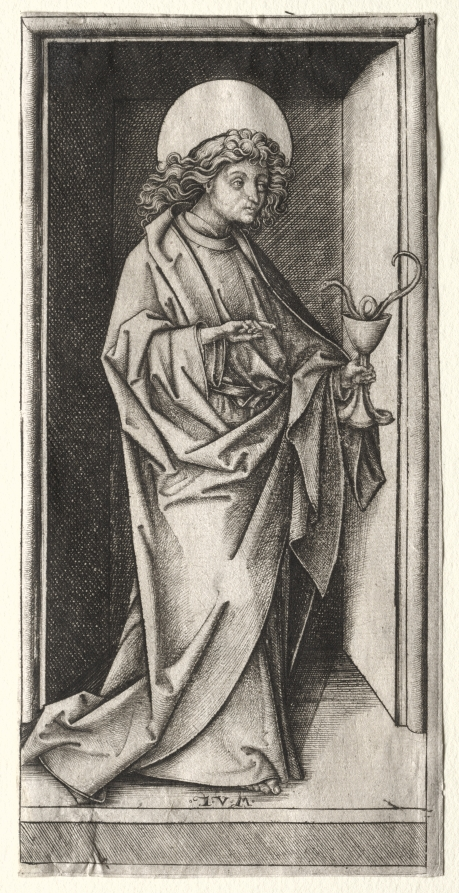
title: St. John with Serpent in Chalice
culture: Germany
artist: Israhel van Meckenem (German, c. 1440–1503)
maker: after Hans Holbein (German, c. 1465–1524)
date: c. 1480–1500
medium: engraving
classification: Print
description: According to legend, John the Evangelist was given a cup of poisoned wine that he drank without harm. As emblems of the tale, John’s chalice symbolizes the Christian faith prevailing over death, signified by the serpent. As a print, Meckenem's representation of Saint John like a sculpture in an architectural niche made it possible for more people to personally own a religious image that they might otherwise only have seen at a church.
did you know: Saint John was an especially popular saint throughout the Middle Ages and into the early modern era because his devotion to Christ set an example for all good Christians.